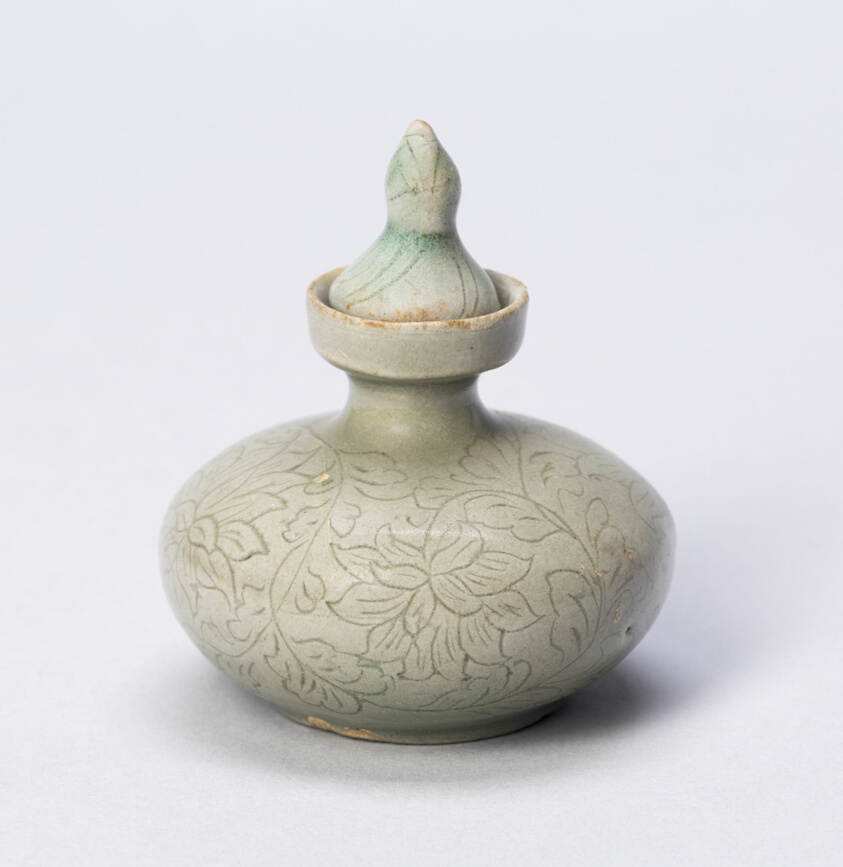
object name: Vessel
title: Covered Jar with Floral Motifs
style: Korean (culture or style)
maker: Korea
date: Goryeo dynasty (918–1392), 12th-13th century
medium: Stoneware with celadon glaze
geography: Korean Peninsula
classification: vessel